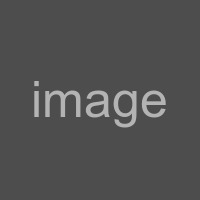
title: Returning to the Village in a Rainstorm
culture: China, Ming dynasty (1368–1644)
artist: Xie Shichen (Chinese, 1487–after 1567)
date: 1530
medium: Handscroll; ink and light color on silk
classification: Painting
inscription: 風雨歸村圖 嘉靖庚寅秋日樗仙謝時臣. [印] 謝時臣印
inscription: 3 additional seals unidentified.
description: This scroll depicts a wind- and rainswept landscape with figures in the countryside struggling against a late summer monsoon rainstorm. Such weather was familiar to residents of the lower Yangzi delta. Xie Shichen spent most of his life in the Suzhou area. Details of his career are scant, but his surviving works suggest that he made his living as a professional painter. This painting conveys drama and anecdotal observations, characteristic of Zhe school paintings, such as the one by Lü Wenying, CMA 1970.76.